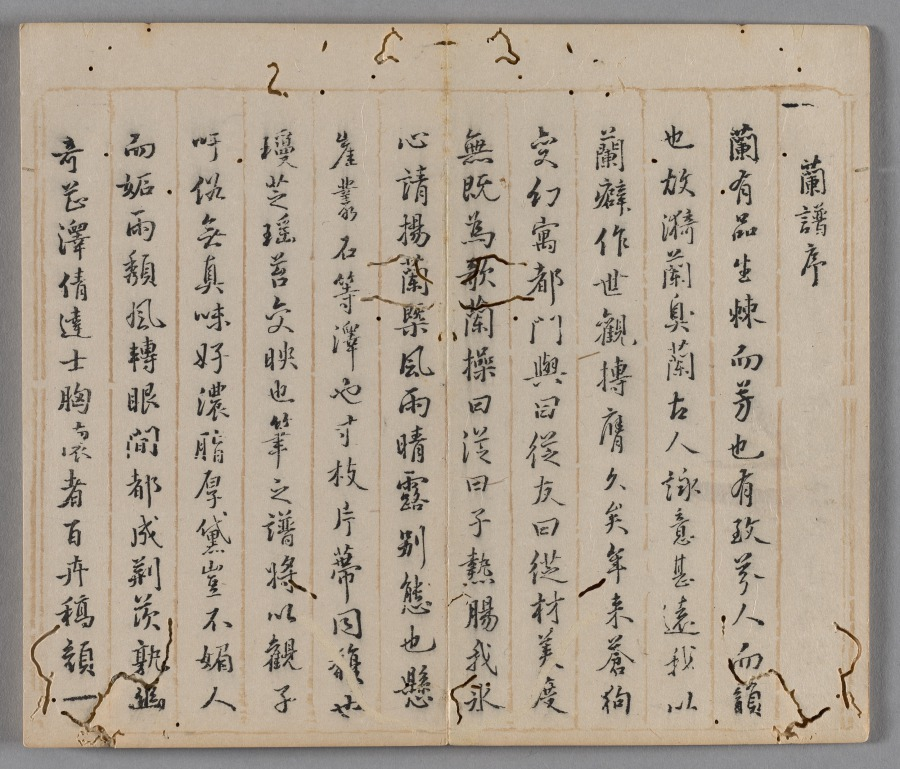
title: Ten Bamboo Studio Painting and Calligraphy Handbook (Shizhuzhai shuhua pu): Orchids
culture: China, Qing dynasty (1644-1911)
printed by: Hu Zhengyan (Chinese, c. 1584–1674)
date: 1633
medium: Woodblock-printed book; ink and colors on paper; first edition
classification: Print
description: Color printing reached a level of perfection in the early 1600s, as seen in this Ten Bamboo Studio Collection of Calligraphy and Painting and the Mustard Seed Garden Manual of Painting (printed 1679 and 1701). The painterly quality, precision in registering (aligning) the woodblocks, and harmonious colors made them the most successful color print editions in Chinese history. Both editions were printed and compiled in Nanjing, spread nationwide, and had a great impact on the arts in Japan and Korea.